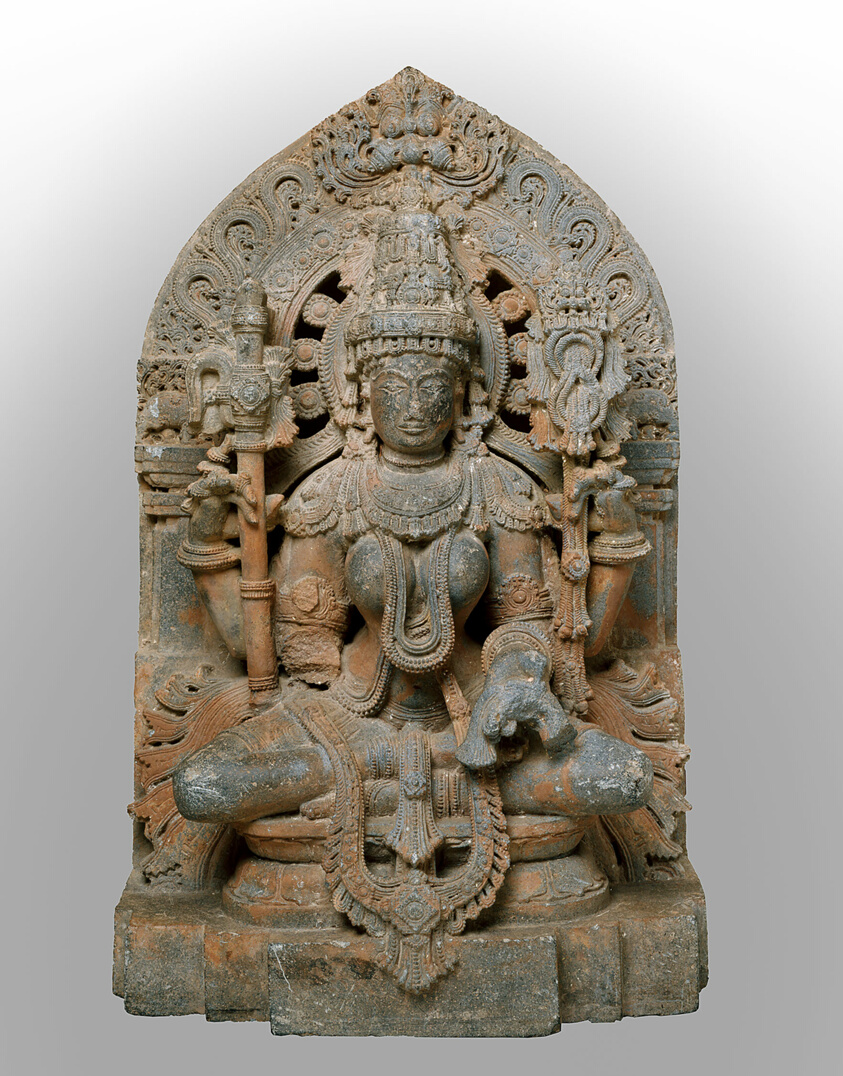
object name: Sculpture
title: Four-Armed Sarasvati, Goddess of Learning, Seated in Lotus Position (Padmasana)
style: South Asian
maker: India; Karnataka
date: Hoysala period, 12th century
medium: Chlorite phyllite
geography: Karnataka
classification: schist; stone; sculpture; asian art